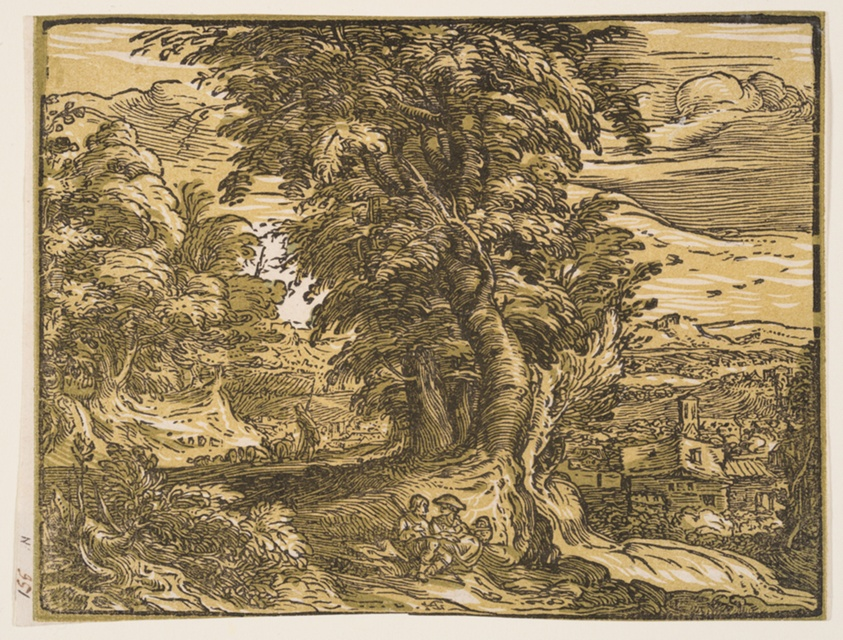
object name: Print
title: Landscape with a Shepherd Couple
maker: Hendrick Goltzius (Dutch, 1558–1617)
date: c. 1600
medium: Chiaroscuro woodcut from three blocks printed in green on ivory laid paper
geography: Netherlands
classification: woodcut; paper; print; prints and drawing